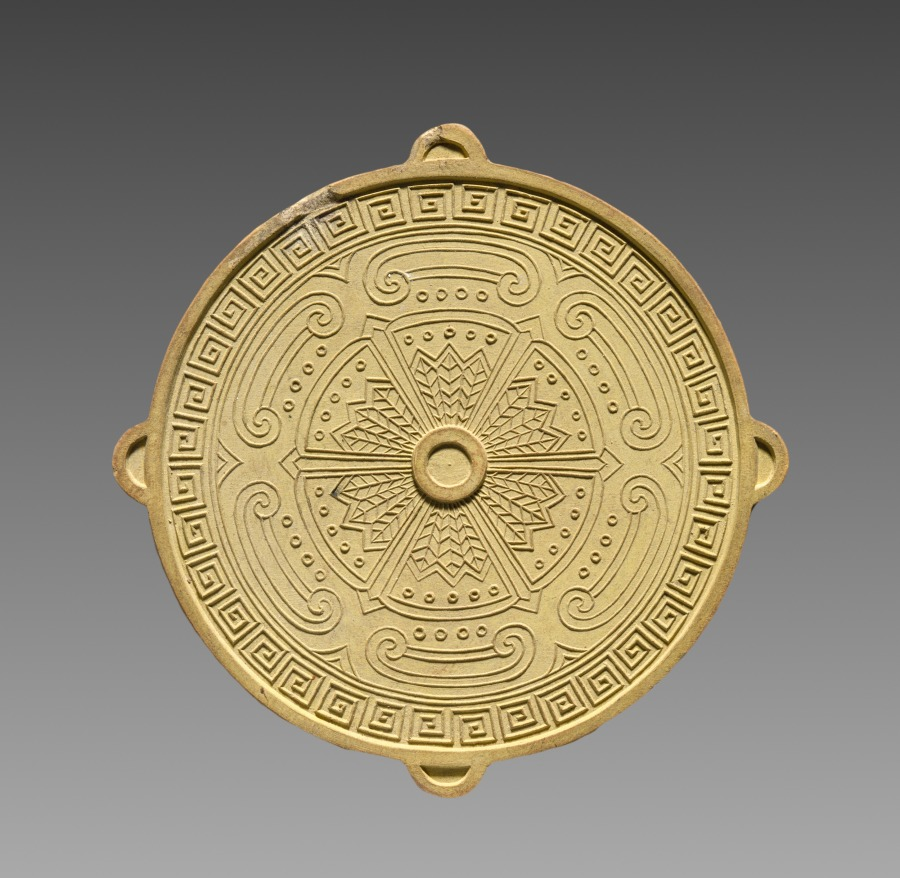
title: Box with Ink Cakes: Yellow Ink Stick in Shape of a Buddhist "Wheel of the Law"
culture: China, Qing dynasty (1644-1911), Jiaqing reign (1795-1820)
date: 1795–1820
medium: Molded ink in yellow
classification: Miscellaneous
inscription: 如意寶輪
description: Ink cakes (also called ink sticks) are dissolved with the addition of water and then ground on the surface of a flat square stone into liquid ink for painting and calligraphy. The precious ink cakes here, however, have never been used. The inscription on the side of the blue ink cake says that the set was commissioned by Chen Huai, Governor of Jiangxi Province.